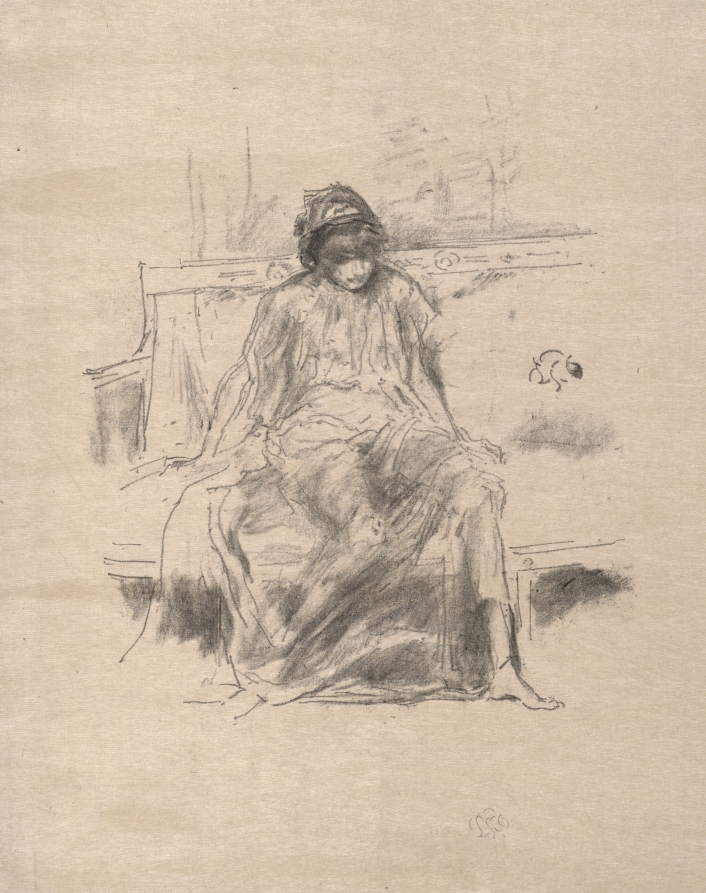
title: The Draped Figure Seated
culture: America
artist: James McNeill Whistler (American, 1834–1903)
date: 1893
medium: lithograph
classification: Print